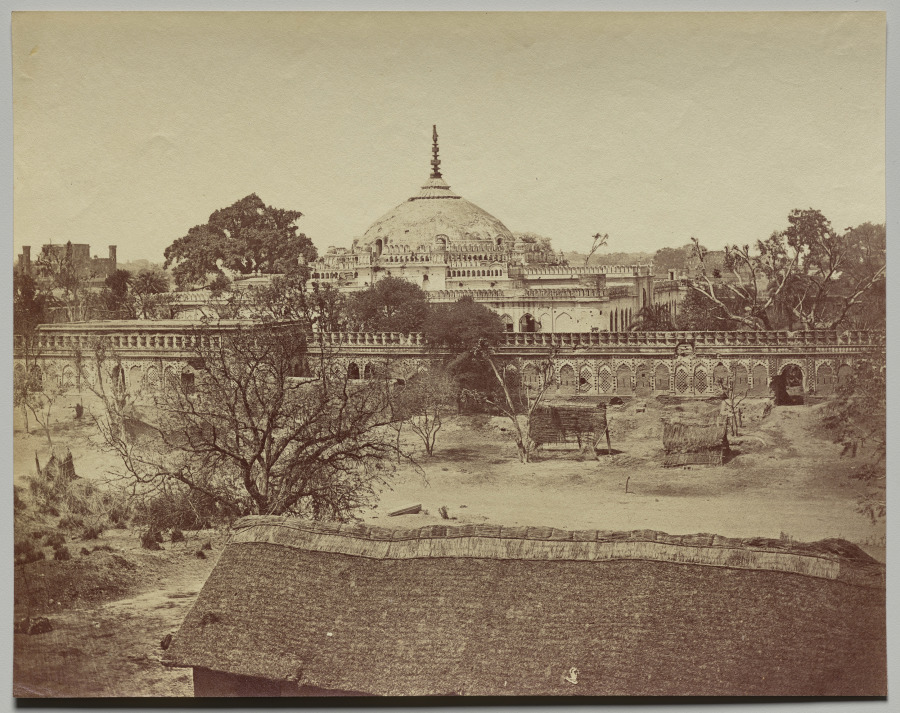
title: The Shah Nyjuff or Najaf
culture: England, 19th century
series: Lucknow After the Siege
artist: Felice A. Beato (British, 1832–1909)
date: 1858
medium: albumen print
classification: Photograph